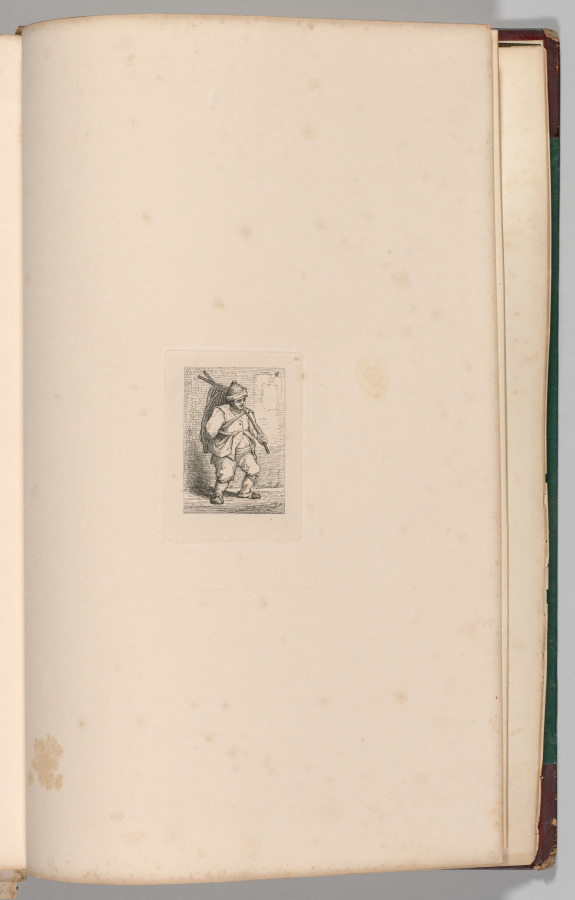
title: Liber Studiorum: Plate 48, A Study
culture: England, 19th century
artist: John Sell Cotman (British, 1782–1842)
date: 1838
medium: etching, from a bound volume containing 48 plates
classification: Bound Volume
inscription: In plate, above image, upper right: 48; upper right, within image, monogram: JSC